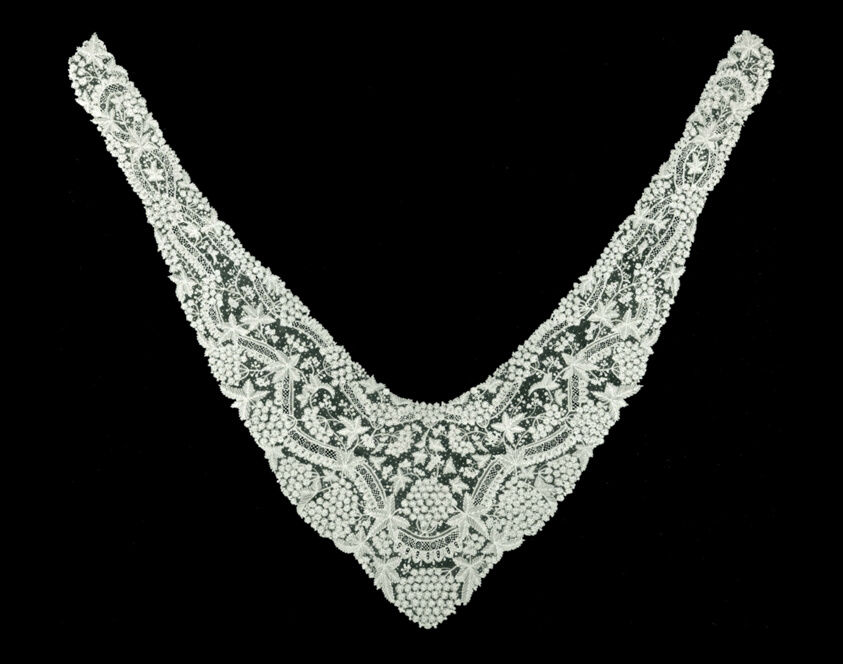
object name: Textile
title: Collar and Pair of Cuffs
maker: Belgium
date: 1880s/90s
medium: Cotton, mixed lace: bobbin part lace of a type known as "Duchesse" and of needle lace of a type known as "Point de Gaze"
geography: Belgium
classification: textile; lace - mixed